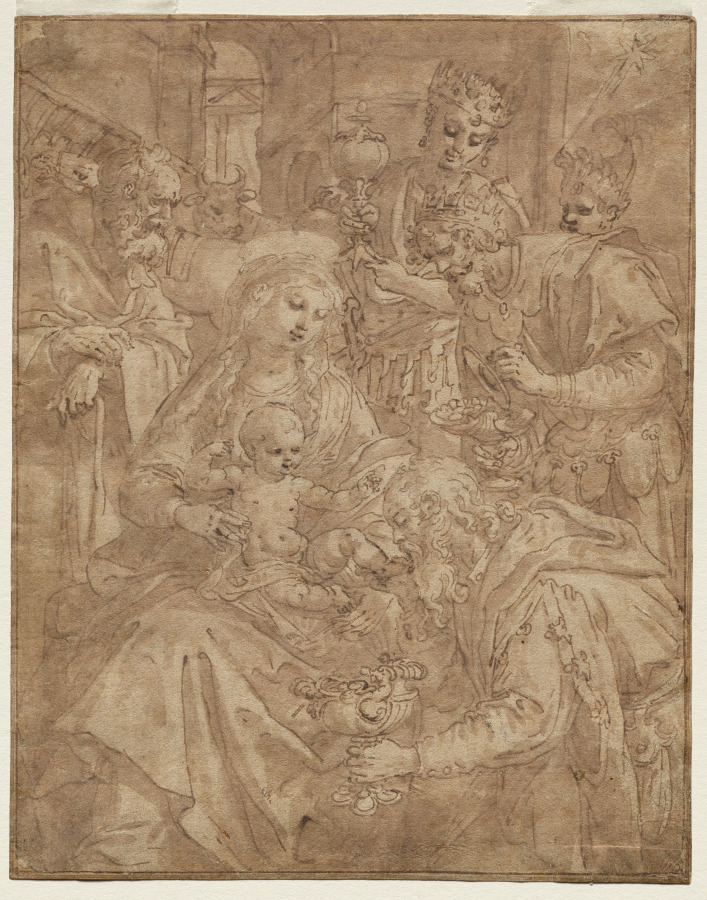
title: Adoration of the Magi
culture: South Netherlands, 16th century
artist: Maarten de Vos (Flemish, 1532–1603)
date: c. 1590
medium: Pen and brown ink, brush and brown wash; traces of transfer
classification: Drawing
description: The drawing is a print design made to be translated to a copperplate in the city of Antwerp in the late 16th century. De Vos’s closely cropped composition brings the three magi as well as Joseph into close contact with the seated Virgin and Child. The elaborate vessels carried by the magi, including a footed nautilus cup, a silver dish, and what could be a coconut cup, are the types of exotic treasures that would have been collected by Antwerp’s wealthy inhabitants signifying their contact with foreign lands. The magi furthest back is portrayed as African, a not uncommon but by no means universal interpretation of the magi’s origins.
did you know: In this depiction of the adoration of the magi, the magi furthest back is portrayed as African, a not uncommon but by no means universal 16th-century interpretation of the magi’s origins.